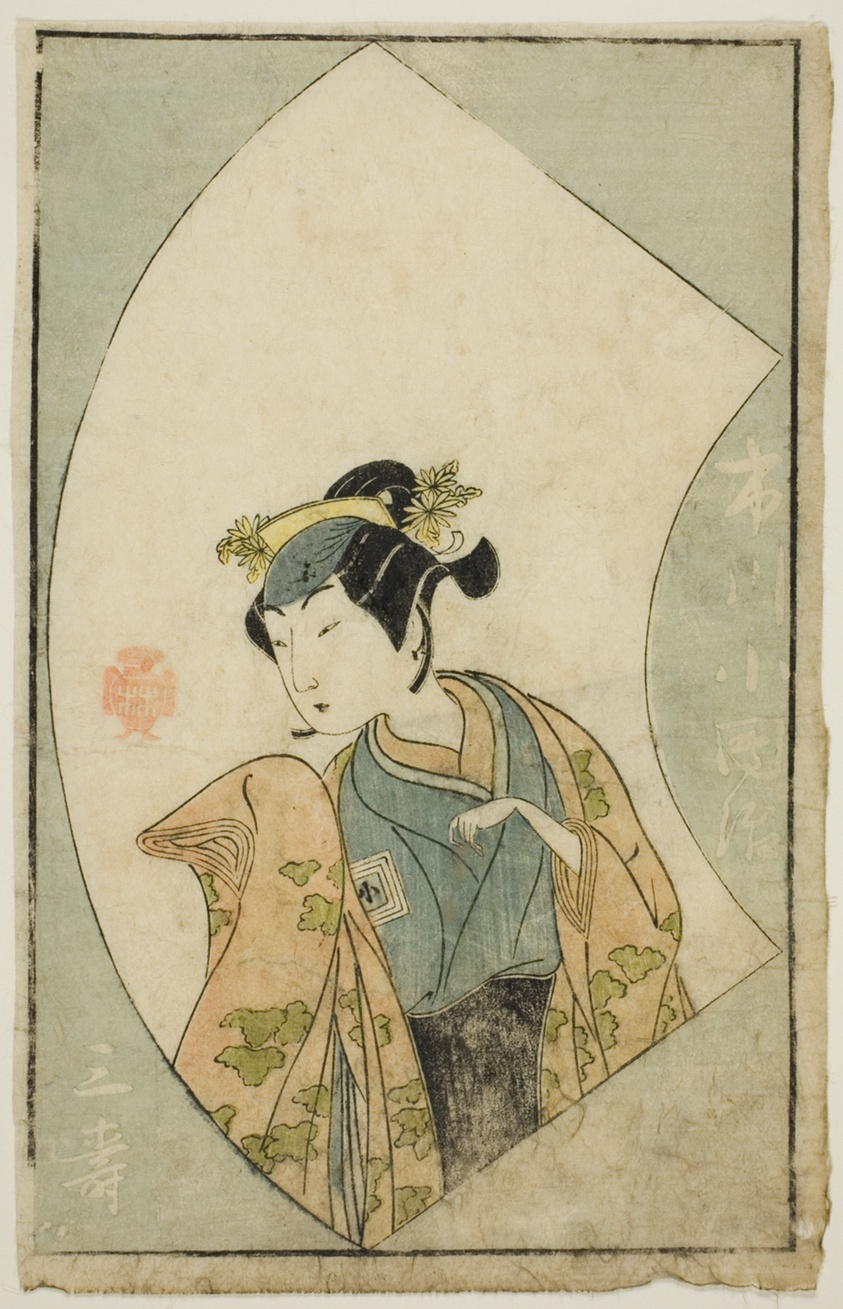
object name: Print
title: The Actor Ichikawa Kodanji II, from "A Picture Book of Stage Fans (Ehon butai ogi)"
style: Japanese (culture or style)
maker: Katsukawa Shunsho 勝川 春章; Japanese, 1726-1792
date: 1770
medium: Color woodblock print; page from illustrated book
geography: Japan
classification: woodblock print; print; asian art